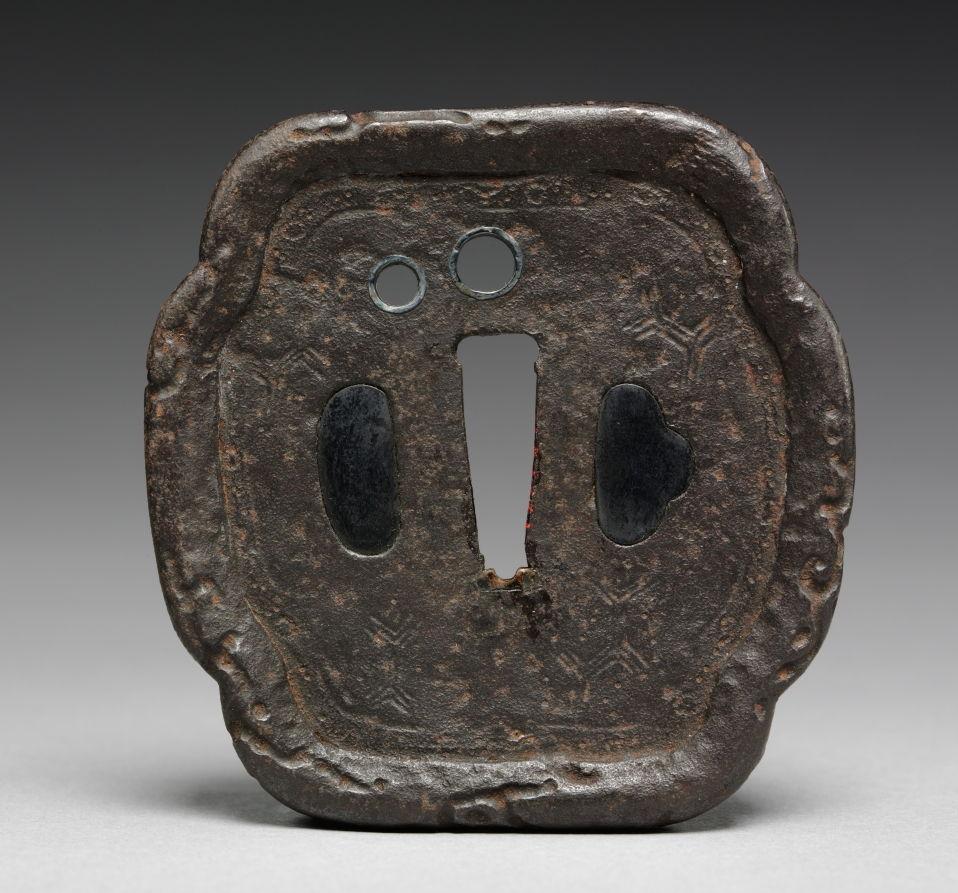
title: Sword Guard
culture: Japan, Muromachi period (1392–1573) to Momoyama period (1573–1615)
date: 1500s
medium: iron (Myochin type)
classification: Arms and Armor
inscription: signed "Nobuiye."